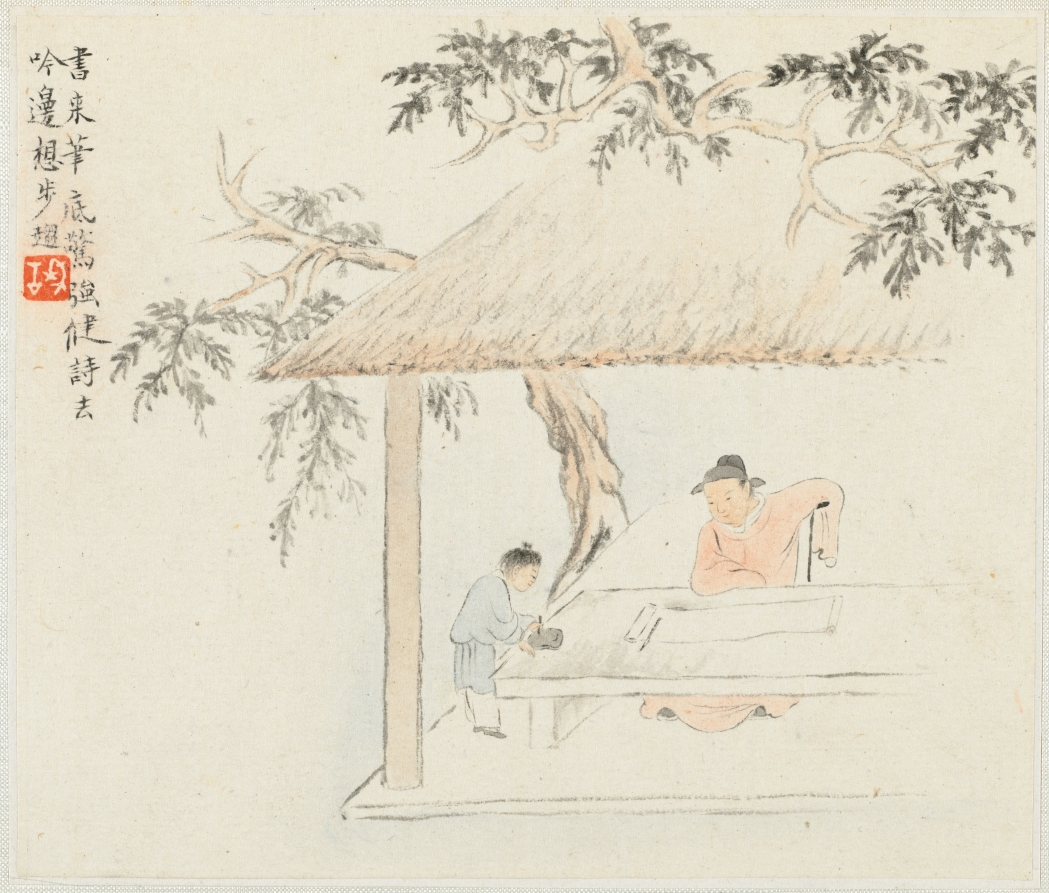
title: Album of Landscape Paintings Illustrating Old Poems: A Scholar at a Table with a Servant aside Preparing the Ink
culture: China, Qing dynasty (1644-1911)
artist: Hua Yan (Chinese, 1682–c. 1765)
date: 1745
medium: Album leaf; ink and light color on paper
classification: Painting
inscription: Calligraphy and seal, upper left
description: Hua Yan is one of the Eight Eccentrics of Yangzhou, who rejected Orthodox ideas about painting.